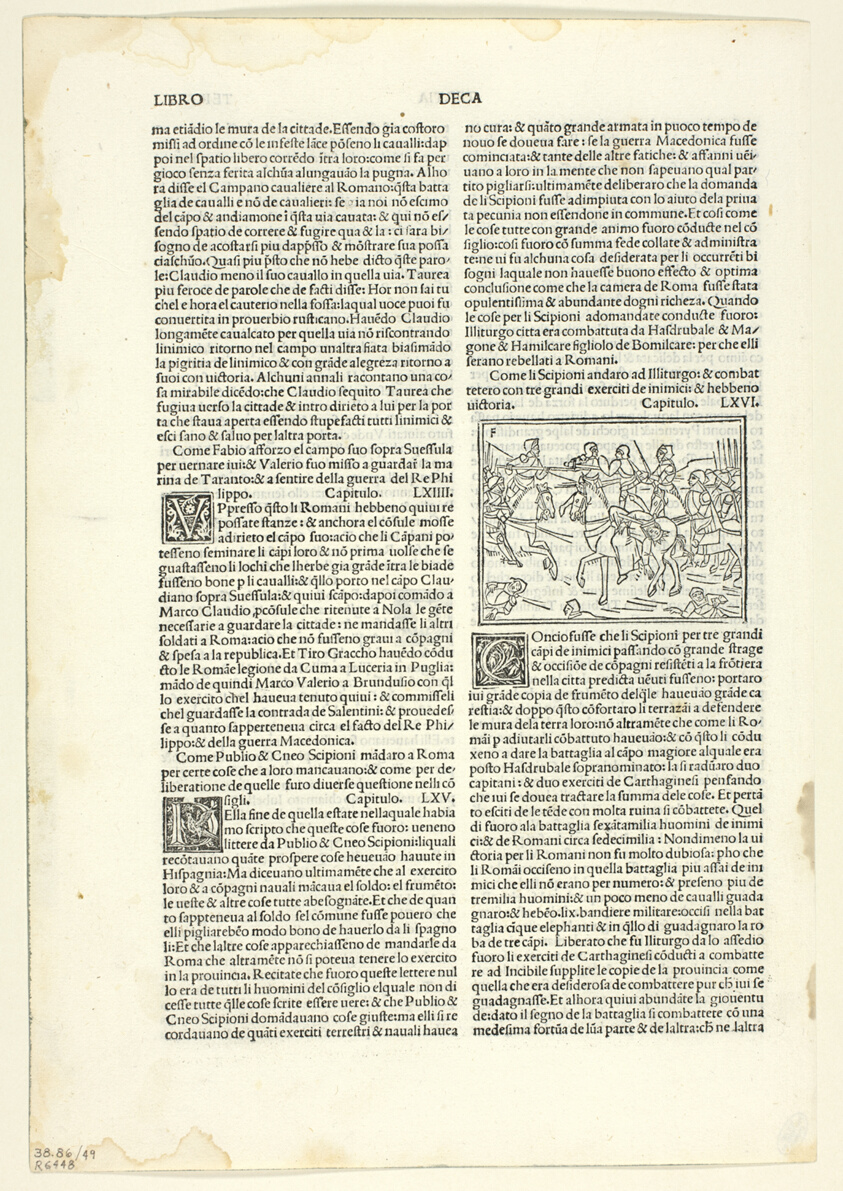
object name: Print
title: The Victory of the Scipios at Illiturgo from Historiae romanae decades (Roman History), Plate 49 from Woodcuts from Books of the 15th Century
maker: Monogrammist F (Venice, late 15th century); printed by Johannes Rubeus (Italian, active 1480-1519); published by Lucantonio Giunti (Italian, 1457-1538); original text by Livy (Ancient Roman, 64/59 B.C.–17 A.D.); portfolio text by Wilhelm Ludwig Schreiber (German, 1855–1932)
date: 1493, portfolio assembled 1929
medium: Woodcut in black, and letterpress in black (recto and verso), on cream laid paper, tipped onto cream wove paper mat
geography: Italy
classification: woodcut; print; prints and drawing